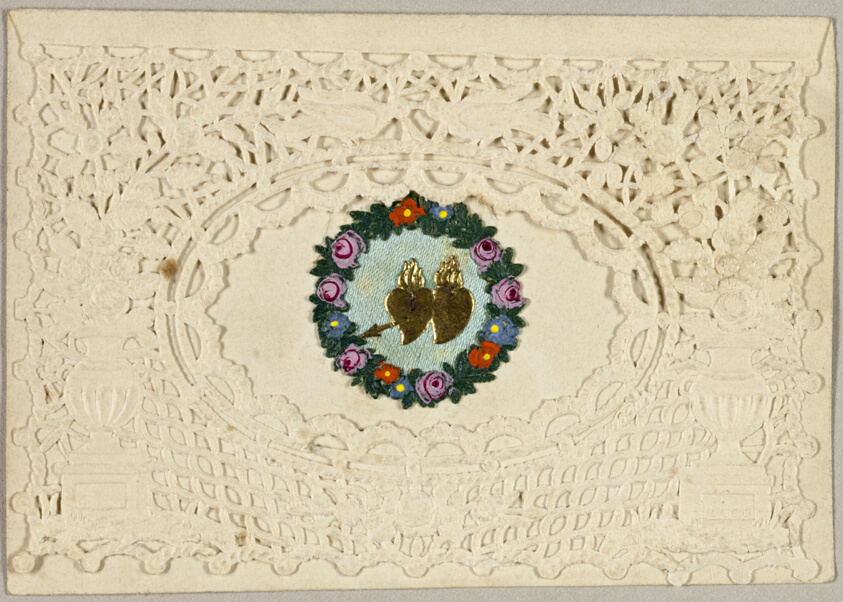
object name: Drawing and Watercolor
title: Untitled Valentine (Hearts on Fire)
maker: George Meek (English, 19th century)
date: c. 1840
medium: Collaged elements on cut and embossed (designed) cream wove paper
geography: England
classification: collage; valentine; prints and drawing; paper